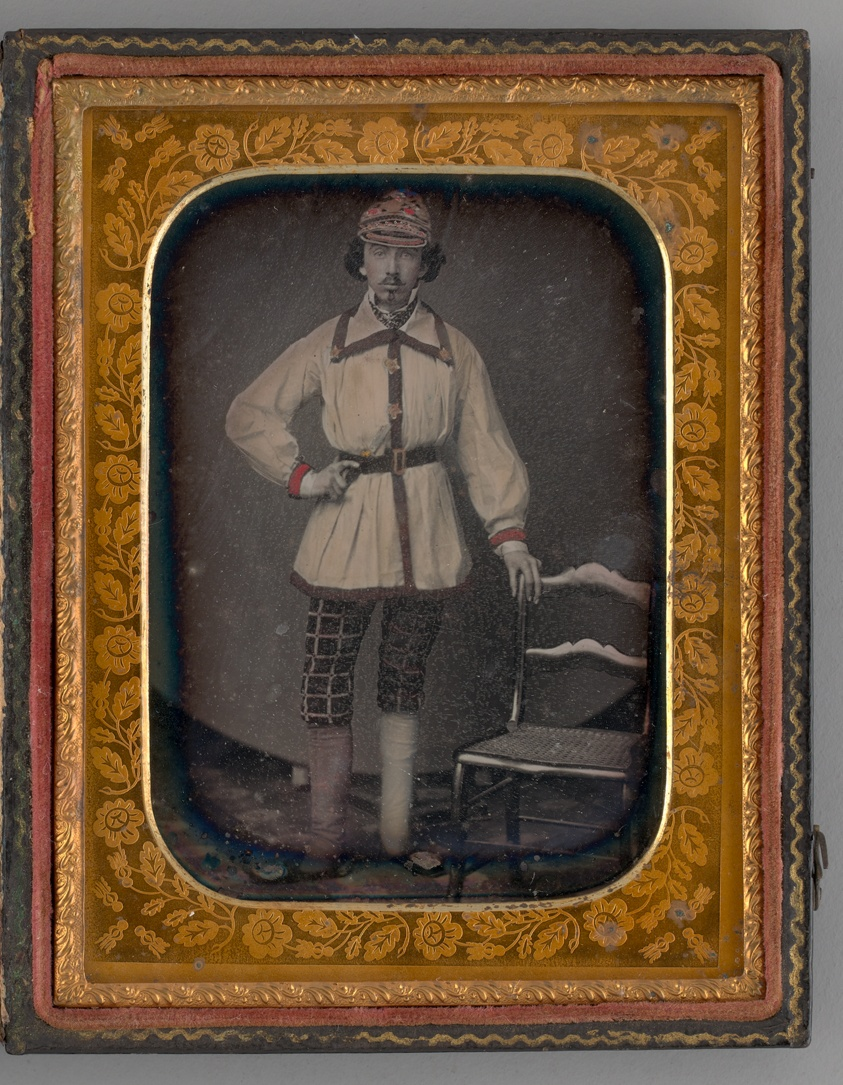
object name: Photograph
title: Untitled (Portrait of a Standing Circus Performer)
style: 19th century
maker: Jesse Harrison Whitehurst (American, 1819–1875)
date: 1855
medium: Daguerreotype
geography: United States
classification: portrait; daguerreotype; portrait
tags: lundberg collection, Male, portrait, portraits, portraits: male subject